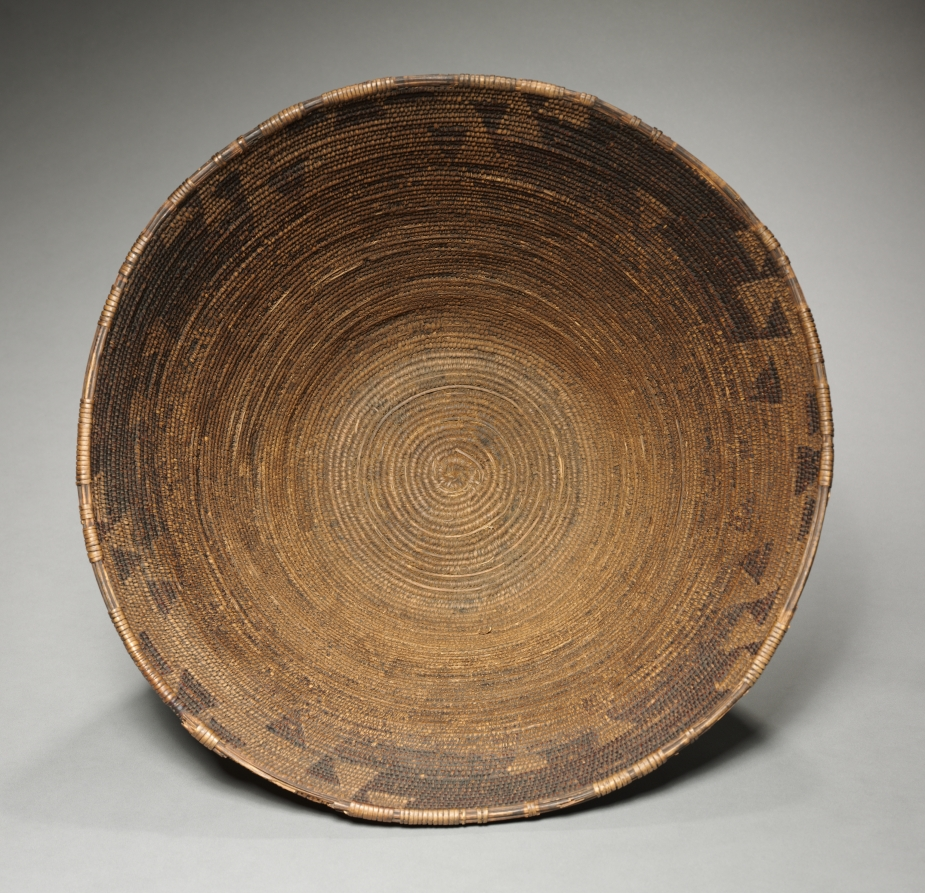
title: Cooking Bowl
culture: California, Maidu, Southern (Nisenan), Unassigned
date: Unassigned, before 1917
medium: redbud, coiled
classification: Basketry